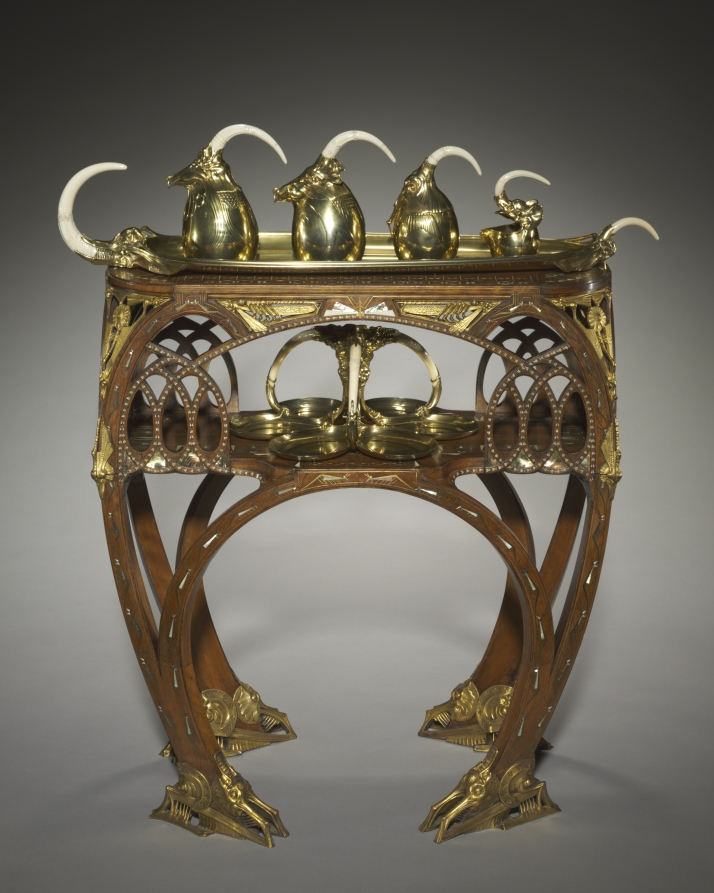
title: Salver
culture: France, Paris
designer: Carlo Bugatti (Italian, 1856–1940)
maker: Adrien-Aurélien Hebrard (French, 1866–1937)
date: c. 1907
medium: Gilt silver and ivory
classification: Silver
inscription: inscribed inside one of six ovoid compartments: "Bugatti" in ligature. Engraved on back: A.A. HEBRAND/ 8 RUE ROYAL/PARIS FRANCE.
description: This tea and coffee service, salver, and table, together with some now missing cups, were all designed by Carlo Bugatti as an ensemble and presented at the 1902 exposition devoted to decorative arts in Turin, Italy. The set was probably acquired from Bugatti's 1907 exhibition at the Galerie Hébrard in Paris by a wealthy South African widow, Anna Blake, who was living there at the time. Some of the animal and insect motifs suggest mythical beasts or the fossils of prehistoric animals. When Mrs. Blake returned to Cape Town, she took these and other pieces designed by Bugatti with her, and they remained in South Africa throughout her lifetime.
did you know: Carlo Bugatti's sons achieved illustrious careers of their own. Rembrandt Bugatti (1884-1916) became a celebrated sculptor, and Ettore Bugatti (1881-1947) manufactured luxurious automobiles and racing cars.